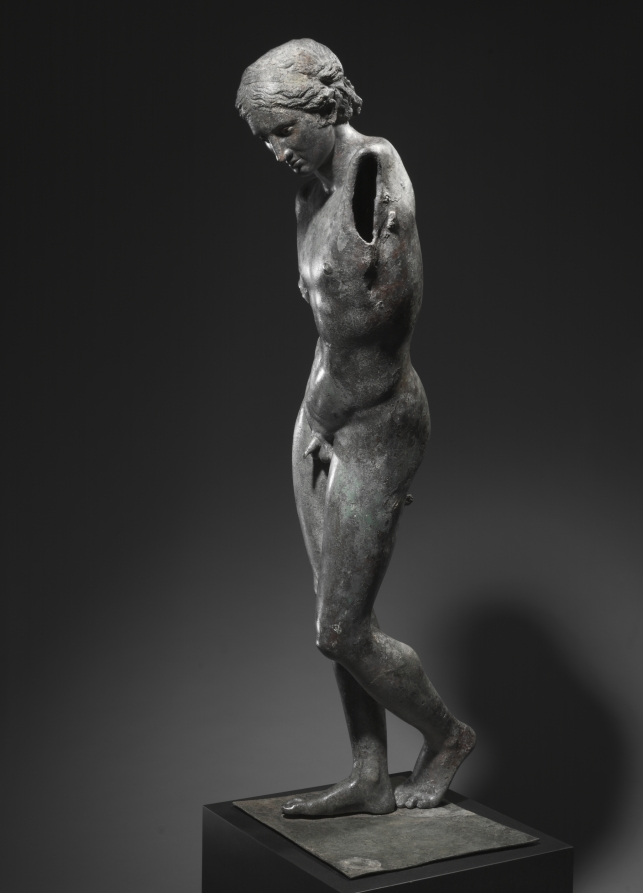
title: The Cleveland Apollo: Apollo Sauroktonos (Lizard-Slayer) or Apollo the Python-Slayer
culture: Greece, Athens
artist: attributed to Praxiteles (Greek, Athenian, c. 400–330 BCE)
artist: or Follower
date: c. 350–200 BCE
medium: bronze, copper, and stone inlay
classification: Sculpture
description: The Cleveland Apollo has been called both Lizard-Slayer (Sauroktonos) and Python-Slayer. The first name comes from the Roman author Pliny the Elder (23–79 CE), who noted in describing bronze works made by the Athenian sculptor Praxiteles (active around 370–330 BCE), “the youthful Apollo [is] known as the Sauroktonos because he is aiming an arrow at a lizard [Greek sauros] which is stealing toward him.” Scholars have long connected this description with artworks showing the young Greek god Apollo in a distinctive pose and hairstyle, standing on his right leg and leaning to his left. In more completely preserved versions, Apollo reaches toward a tree with his left arm and seems to take aim at a lizard. The Cleveland Apollo shows the adolescent god similarly posed and coiffed, making it an important addition to the Apollo Sauroktonos group—the only surviving large-scale bronze sculpture of the type. The young Greek god Apollo, identifiable by his distinctive hairstyle and pose, stands on his right leg and leans to his left, probably toward a now-lost tree. Although now separated, the left forearm and hand survive, together with an unusual lizard-like creature, perhaps drawn from the world of myth. A flat bronze base also remains, though it may be a later adaptation. A tree or other support has been lost, probably smaller than in the marble versions. Given its material and very high artistic quality—note the lifelike hair, fingernails, and inlaid copper lips and nipples—more than one scholar has suggested that the Cleveland Apollo could be the very sculpture seen by Pliny. Some have called the sculpture “Python-Slayer,” seeing the oddly shaped serpentine creature with asymmetrical legs as the mythical Python killed by Apollo in establishing his sanctuary at Delphi. But technical details may explain some of the asymmetry, and no other specific evidence connects it to Delphi. Most scholars would retain the name Sauroktonos (Lizard-Slayer) for the Cleveland Apollo, even as some debate whether it was made by Praxiteles himself or a later follower.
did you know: The Cleveland Apollo is the only surviving large-scale bronze sculpture of its type, Apollo Sauroktonos (the Lizard-Slayer).